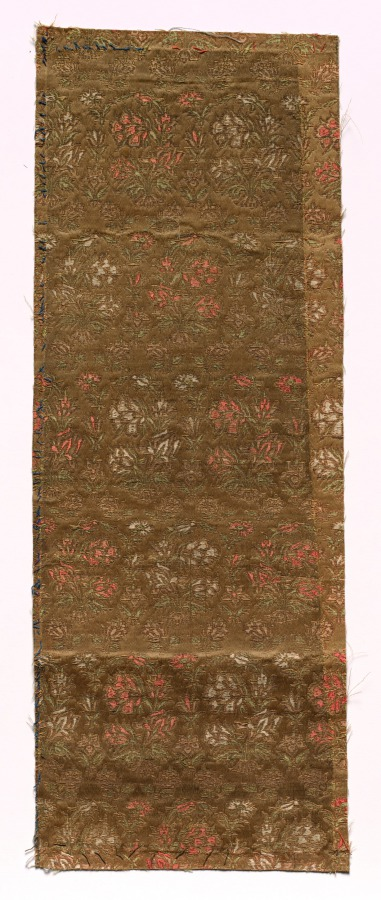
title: Textile Fragment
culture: Japan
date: 1800s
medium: silk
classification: Textile